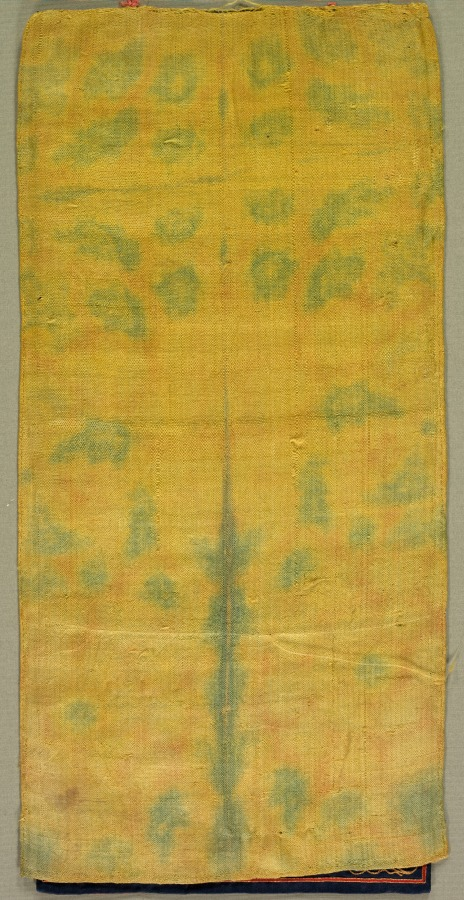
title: Thangka with the Seventh Bodhisattva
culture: China, Ming dynasty (1368–1644)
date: 1368–1424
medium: Silk and gold thread on silk satin ground, embroidery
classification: Embroidery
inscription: Penned on the reverse is a Tibetan inscription that translates as "the Seventh Bodhisattva."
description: In remarkably pristine condition, this embroidery is from a dispersed set that included images of protectors and bodhisattvas. The embroidery technique and pictorial style are Chinese, but the subject matter and the type of devotional hanging called a thangka are associated with Tibetan Buddhism. Historical records state that during the early Ming dynasty (1368–1644), gifts of Buddhist art were sent from China to Tibet, since relationships between Chinese rulers and Tibetan monastic patriarchs were strong and amicable during this time. A Tibetan inscription on the back notes that this figure is the “seventh bodhisattva,” indicating the position in which it would have hung in a temple hall. Odd-numbered works were hung on one side of the main image, and even-numbered works on the other, counting from the center.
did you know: The bodhisattva is flanked by two columns, each topped with a makara, a fanciful water creature whose tail becomes lotus scrolls forming an arch over the bodhisattva.